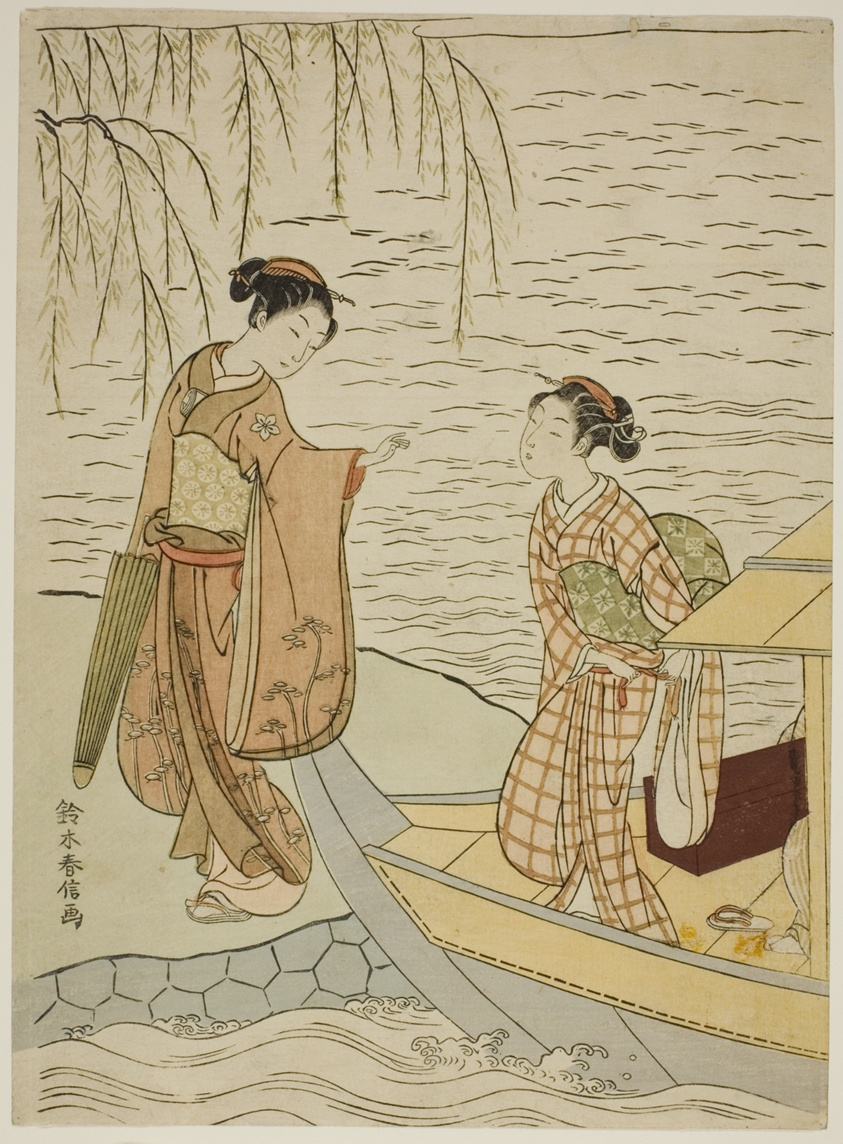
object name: Print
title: Two Girls Leaving a Boat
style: Japanese (culture or style)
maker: Suzuki Harunobu 鈴木 春信; Japanese, 1725 (?)-1770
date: c. 1767/68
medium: Color woodblock print; chuban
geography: Japan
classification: woodblock print; print; asian art